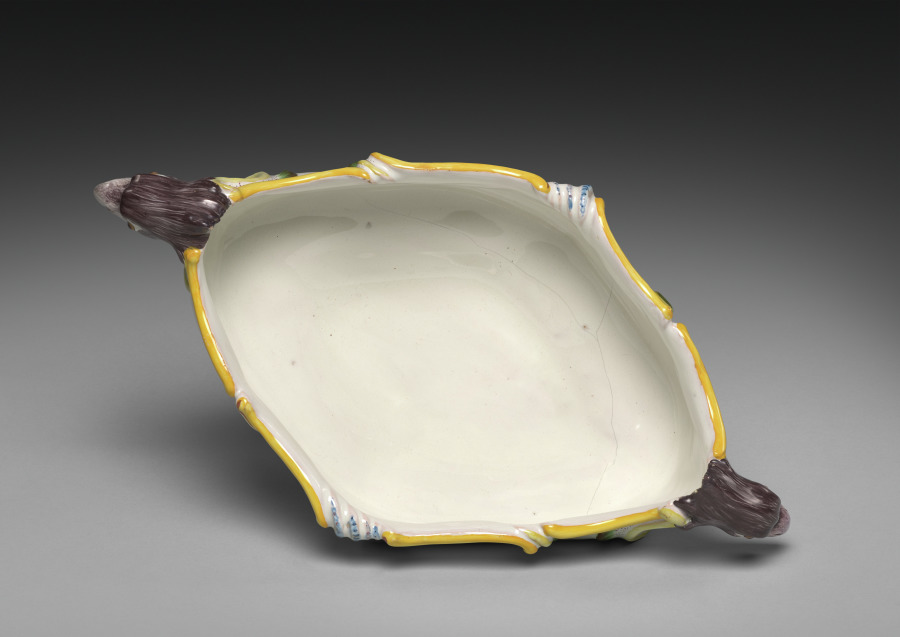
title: Tureen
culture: France, Strasbourg, 18th century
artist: Strasbourg Factory (France)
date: c. 1750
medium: tin-glazed earthenware (faience) with enamel decoration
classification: Ceramic